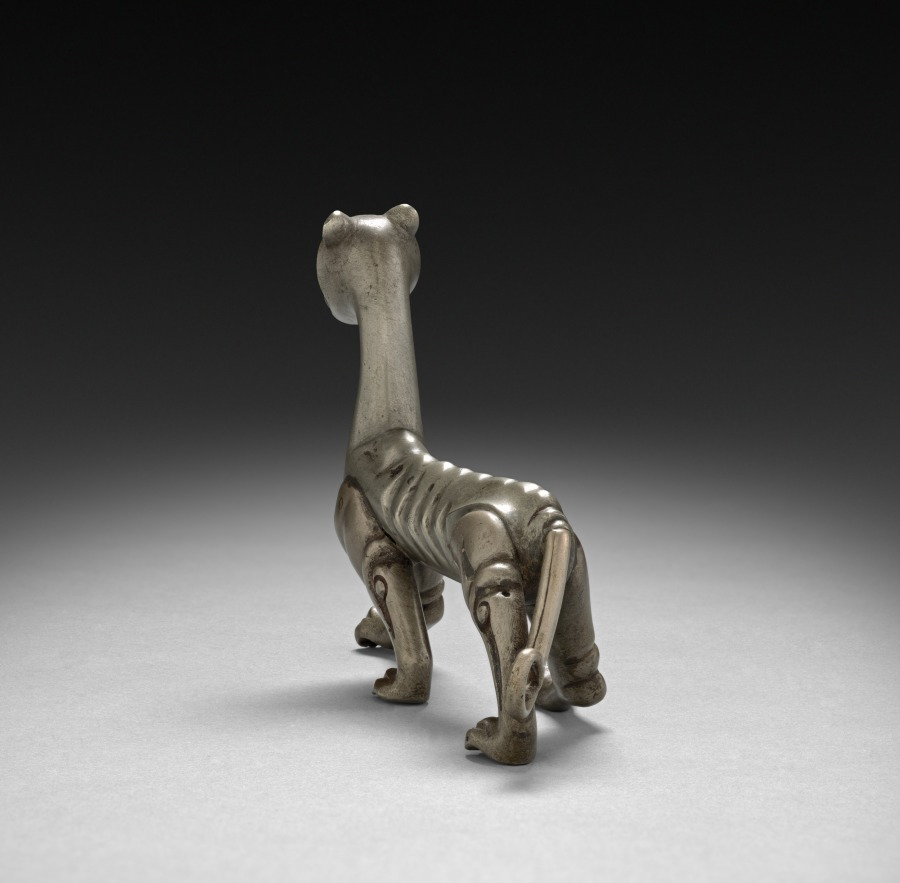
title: Walking Tiger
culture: China, Han dynasty (202 BCE–220 CE) to Six Dynasties (265–587 CE)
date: 206 BCE–220 CE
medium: silver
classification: Sculpture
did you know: The walking tiger was cast in six sections—the head and torso, the four legs, and the tail—and then were soldered together.